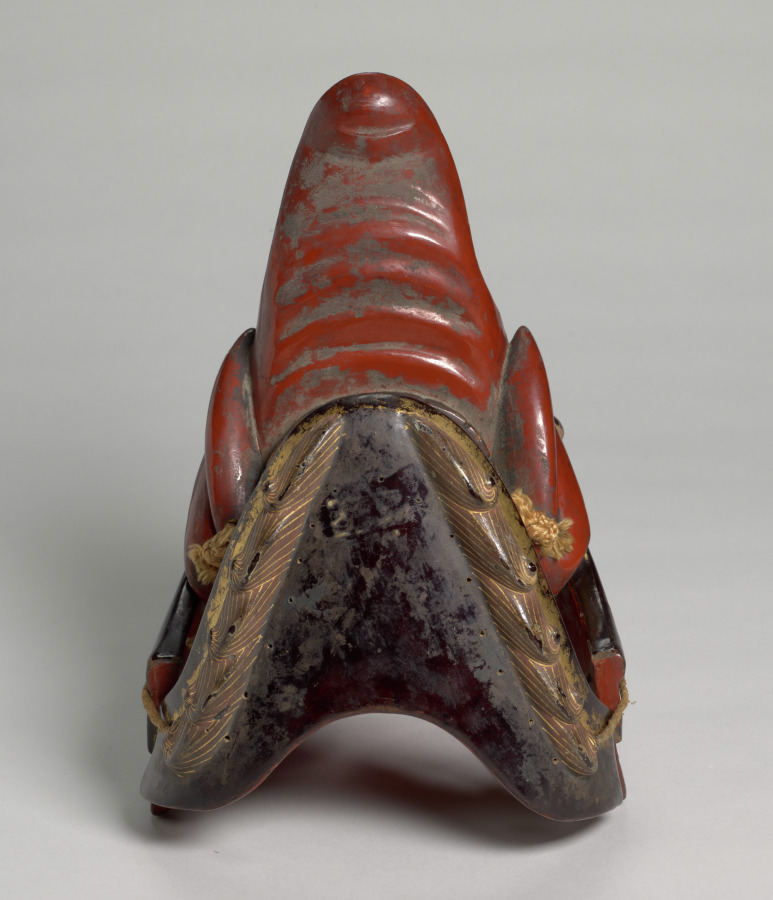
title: Shoulder Piece for a Gigaku Costume in the Form of a Dragon Head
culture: Japan, Kamakura period (1185–1333)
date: 1200s–early 1300s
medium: lacquered wood with color and gold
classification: Sculpture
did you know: This dragon head is made of three pieces of carved lacquered wood with movable jaws fastened with twine.